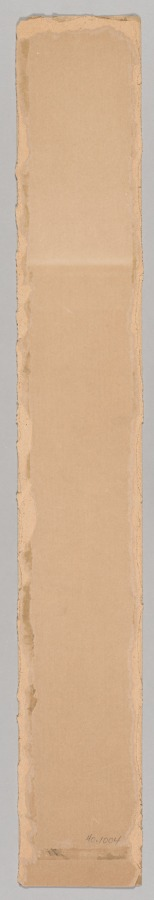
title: A Beautiful Woman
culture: Japan, Edo period (1615–1868)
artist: Torii Kiyomitsu (Japanese, 1735–1785)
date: 1735–1785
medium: color woodblock print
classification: Print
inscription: Signature: Torii Kiyomitsu gwa